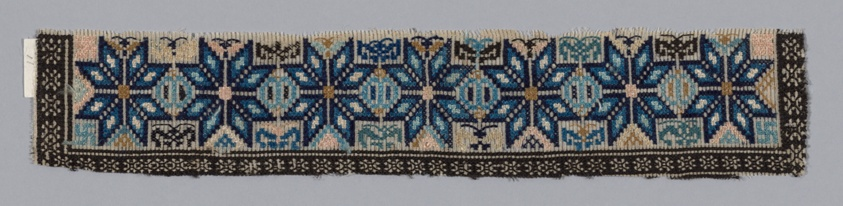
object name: Costume and Accessories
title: Trouser Band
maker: Han-Chinese (China)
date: Qing dynasty (1644–1911), 1875/1900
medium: Forty-four pairs and eight odd pieces of embroidered sleeve, ankle bands, etc. on gauze.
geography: China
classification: textile; embroidery; costume - embroidery; costume